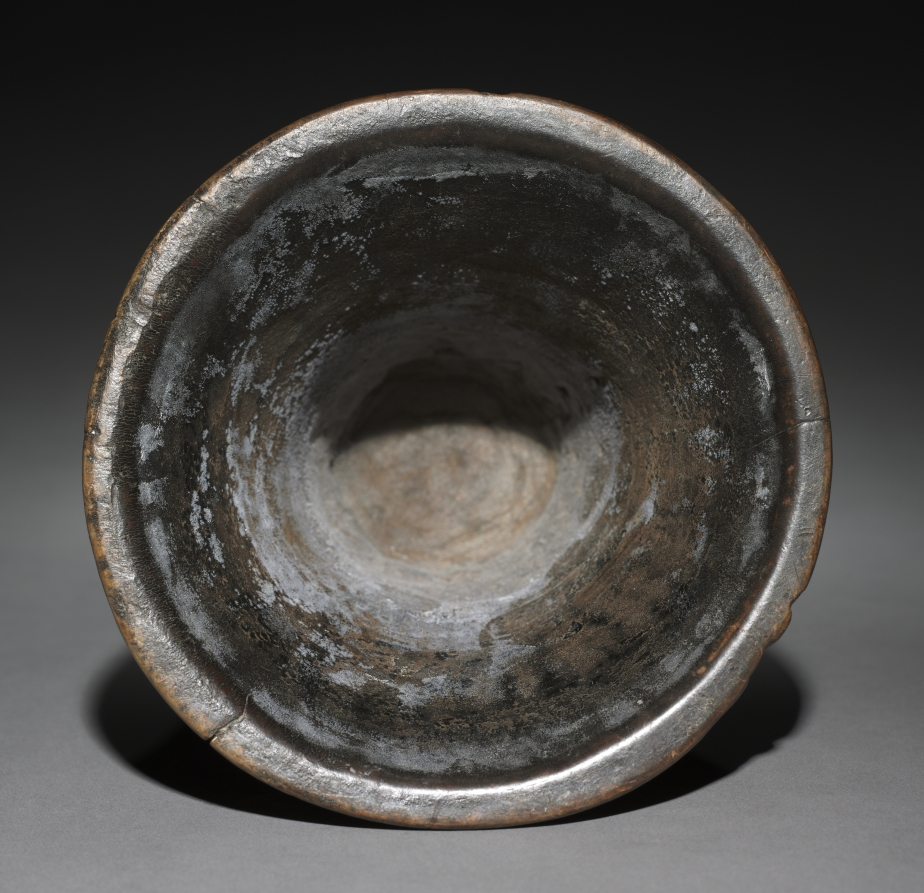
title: Kero (Waisted Cup)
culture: Peru, Colonial Inka style, 16th century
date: after 1550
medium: wood, inlaid pigments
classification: Wood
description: Keros, used to drink the maize beer chicha, were essential items of Inka statecraft. Made and used in pairs, they reflect the important Andean concept of reciprocity. Native use of keros continued in the colonial period, the date of these two examples, which come from separate pairs. The example with geometric motifs is closest to pre-conquest models. On the second, two armies converge: the Inka, dressed in tunics with waistbands, and their opponents, perhaps jungle people whose body parts are heaped in a centerpiece.